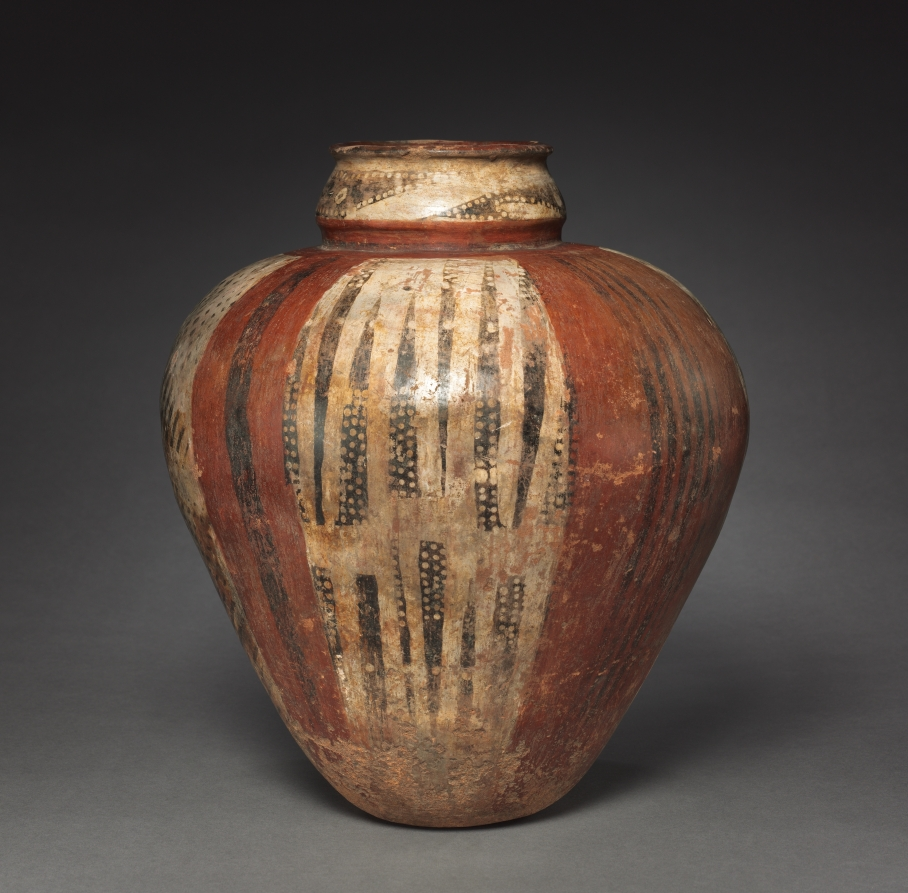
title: Jar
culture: Colombia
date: before 1550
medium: pottery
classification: Ceramic